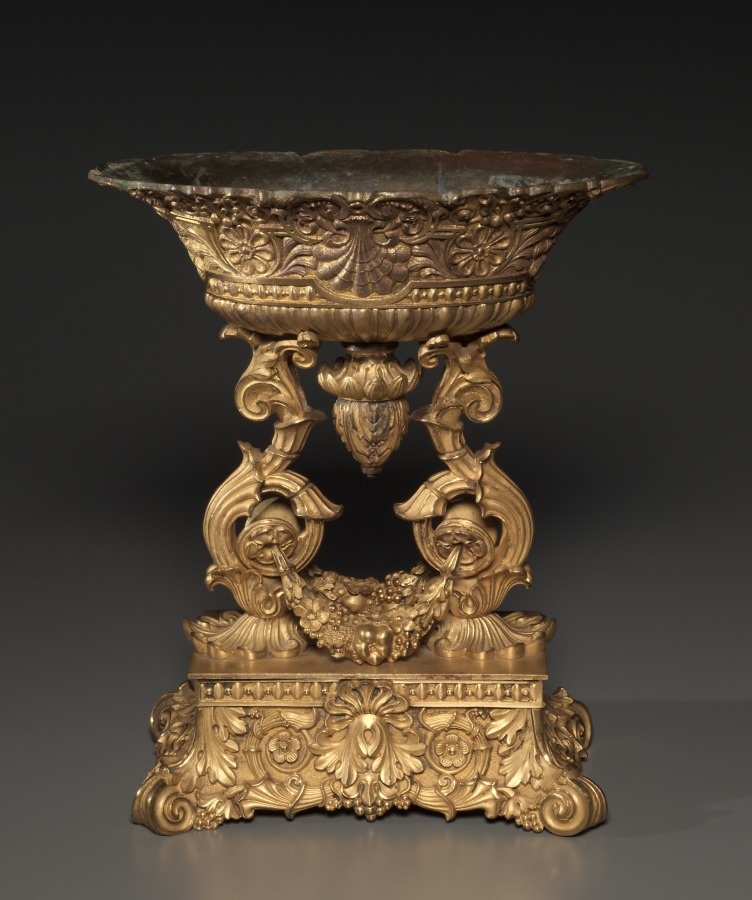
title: Centerpiece, or Jardinière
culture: France, Paris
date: c. 1830–1850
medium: gilt bronze with enamel flowers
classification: Metalwork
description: Regrettably, a maker's mark does not appear on this piece: thus the factory that made it remains unknown. Nevertheless, its design, castings, and gilding are of fine quality and indicate that it is the product of a group of talented craftsmen who worked in the robust taste of the second quarter of the 19th century.